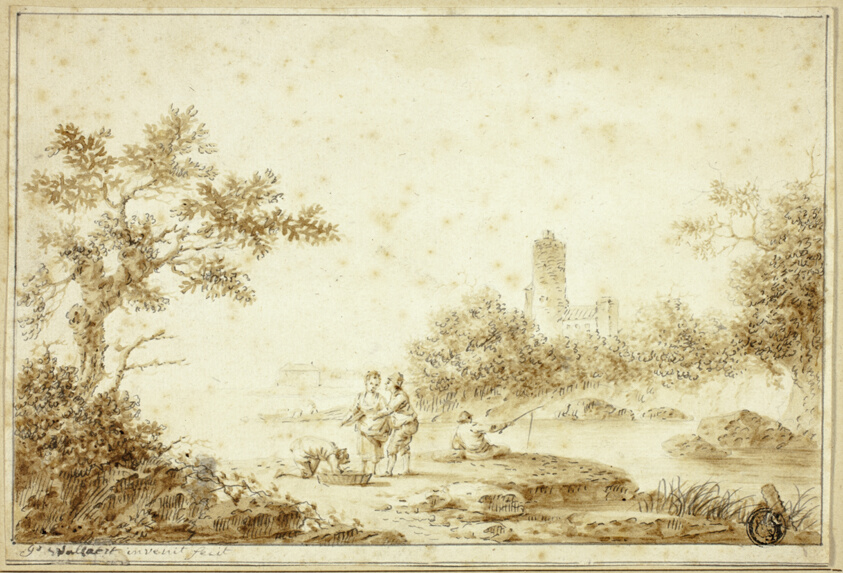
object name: Drawing and Watercolor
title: Landscape with Figures by Stream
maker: Pierre Joseph Wallaert (French, 1753-1812)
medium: Pen and brown ink, with brush and brown wash, over graphite, on ivory laid paper, tipped onto card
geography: France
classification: pen and ink drawings; paper; drawings (visual works); prints and drawing